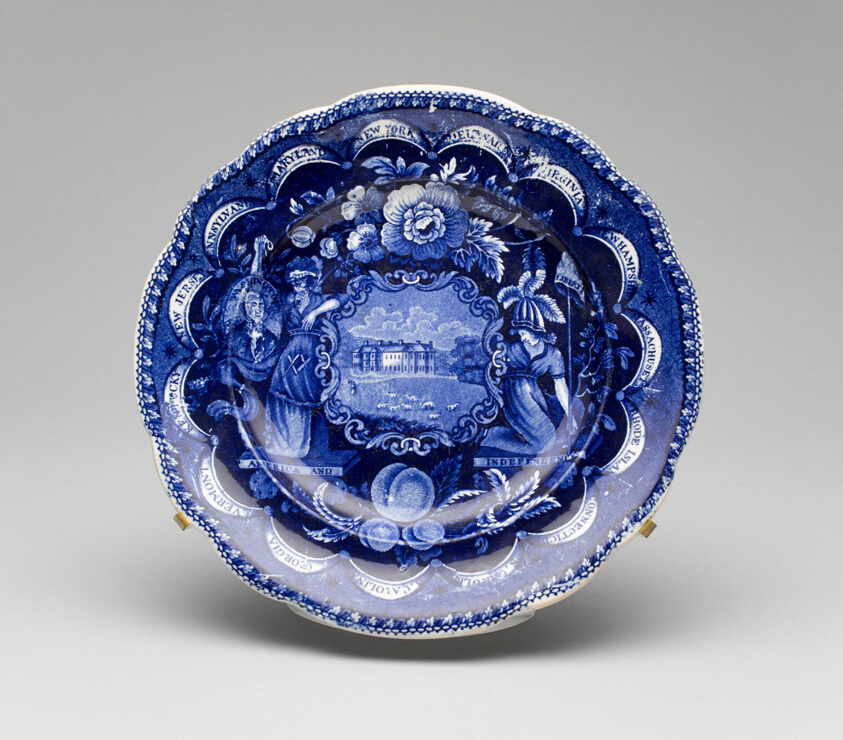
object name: Decorative Arts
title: Plate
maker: James and Ralph Clews; English, active 1818–36; Made for the American market; West Midlands, Stoke-on-Trent, England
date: c. 1826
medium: Earthenware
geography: England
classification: plate (general, dish); earthenware; dish (vessel); american decorative arts; ceramics; decorative arts